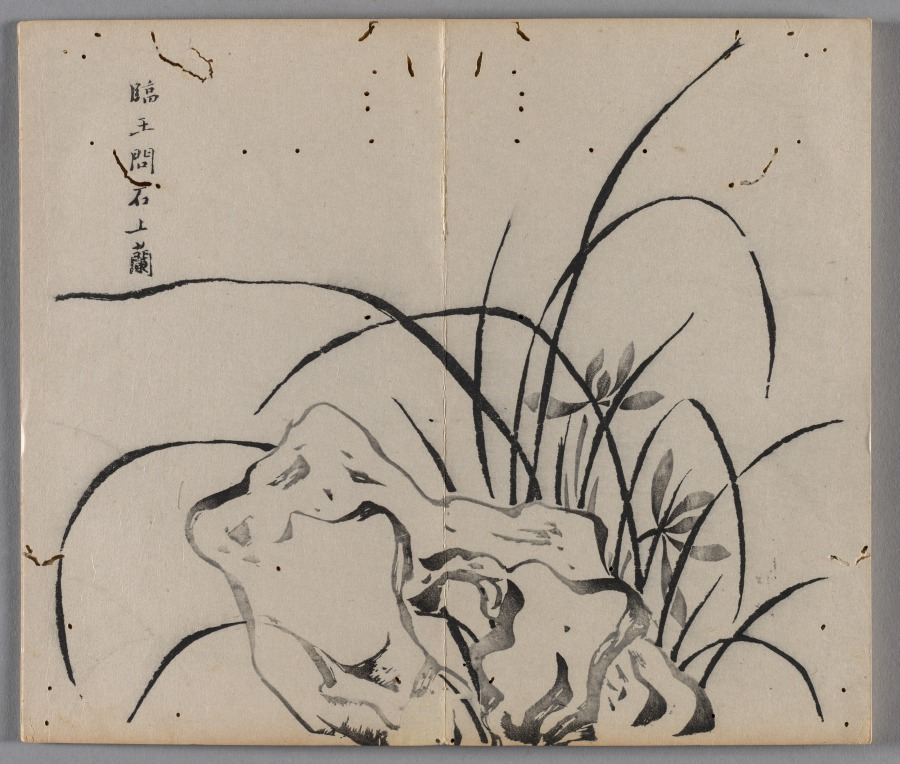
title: Ten Bamboo Studio Painting and Calligraphy Handbook (Shizhuzhai shuhua pu): Orchids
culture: China, Qing dynasty (1644-1911)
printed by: Hu Zhengyan (Chinese, c. 1584–1674)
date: 1633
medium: Woodblock-printed book; ink and colors on paper; first edition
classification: Print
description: Color printing reached a level of perfection in the early 1600s, as seen in this Ten Bamboo Studio Collection of Calligraphy and Painting and the Mustard Seed Garden Manual of Painting (printed 1679 and 1701). The painterly quality, precision in registering (aligning) the woodblocks, and harmonious colors made them the most successful color print editions in Chinese history. Both editions were printed and compiled in Nanjing, spread nationwide, and had a great impact on the arts in Japan and Korea.